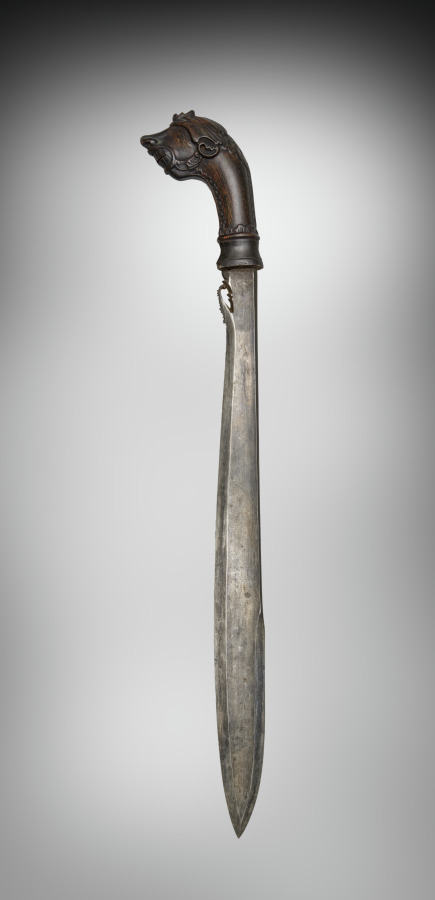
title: Sword and Scabbard (sword)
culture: Java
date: 1700s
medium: steel and ivory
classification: Arms and Armor